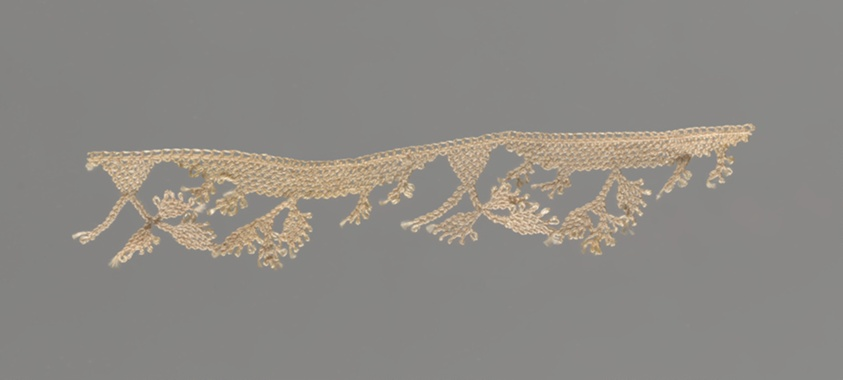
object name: Textile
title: Edging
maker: Eastern Mediterranean, probably Cyprus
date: 1875/1900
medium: Silk, horsehair, and cotton, needle lace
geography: Eastern Mediterranean Region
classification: textile; lace - needle